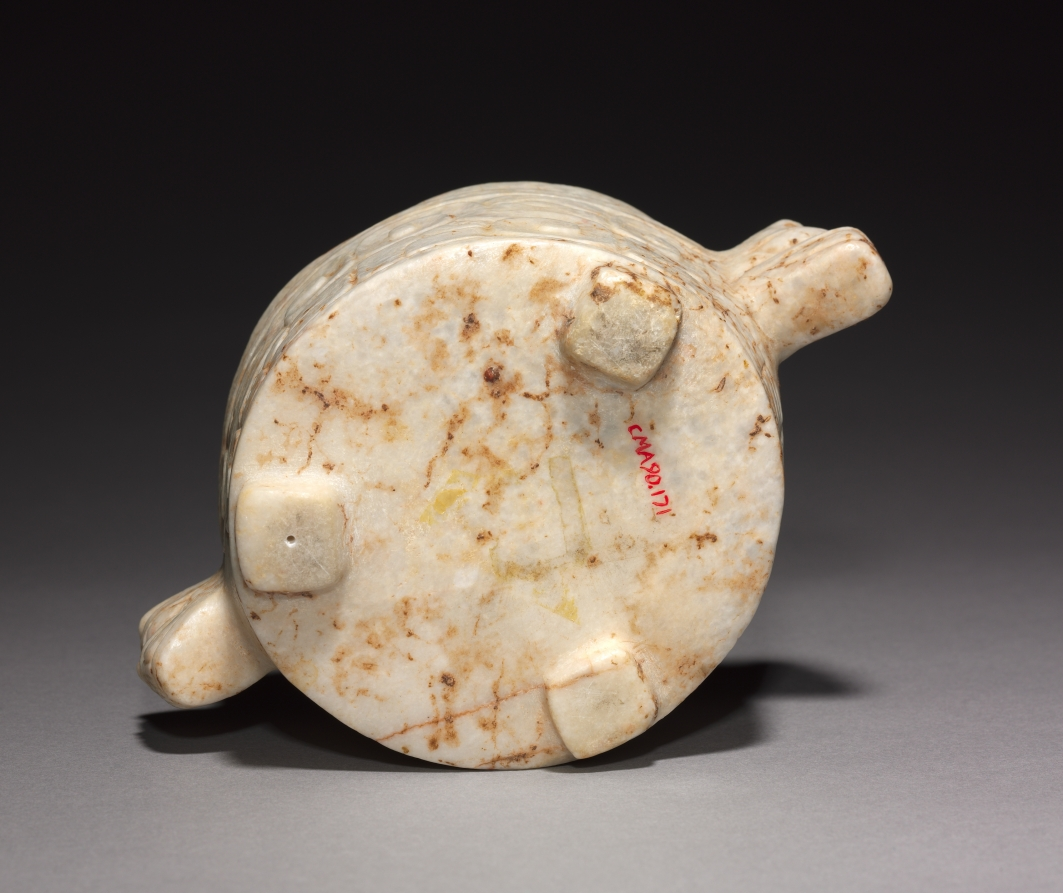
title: Tripod Bowl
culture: Honduras, Ulúa Valley, 7th-10th century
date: 600–1000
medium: marble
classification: Sculpture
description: Between about 600 and 800, white marble vessels carved in dense relief on their outer surfaces were a form of luxury and wealth in the Ulúa region of Honduras. Two confronting profile zoomorphic heads occur on each side of this example, between three-dimensional handles shaped as bat heads. Originally the vessel may have been covered with stucco and brightly painted.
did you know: One of two vessels that were the first ancient American artworks collected by James and Florence Gruener.